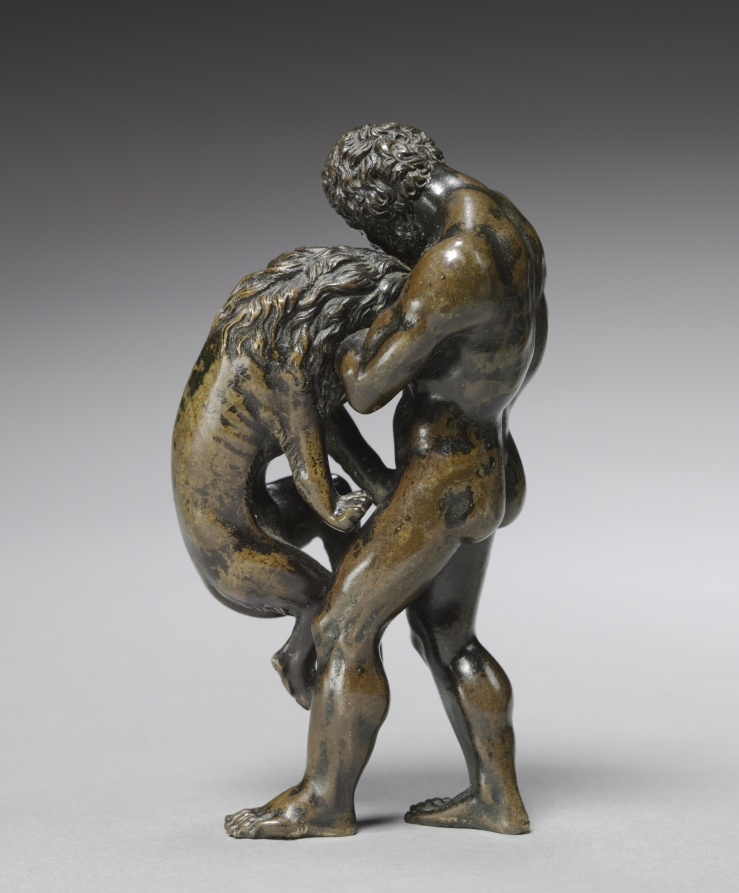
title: Hercules and the Nemean Lion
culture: Italy or France, 16th century or later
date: 1500s or later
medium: bronze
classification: Sculpture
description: The original owner of this work would have understood that this scene referred to the entire story of Hercules, the demi-god who had to accomplish twelve labors. The lion is named after the city of Nemea, near Corinth, a monstrous beast sent by the goddess Hera to wreak havoc on the area. After killing the lion, Hercules wore his pelt, commonly seen in other representations of the hero.